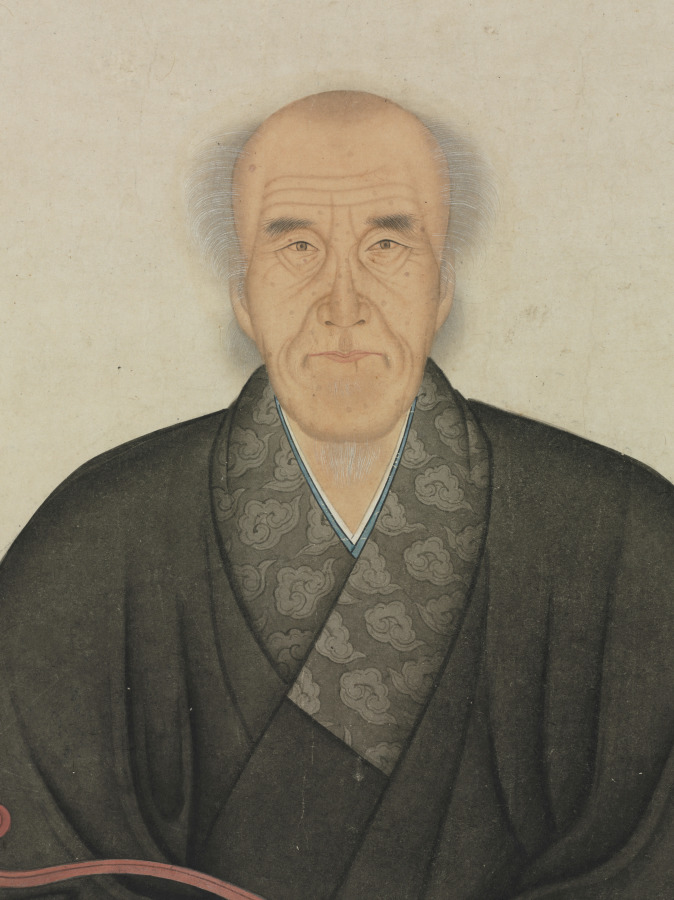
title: Portrait of Duli Xingyi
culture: Japan, Edo period (1615–1868)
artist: Kita Genki (Japanese, active c. 1664–98)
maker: Duli Xingyi (Chinese, 1596–1672)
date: 1671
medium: hanging scroll; ink and color on paper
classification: Painting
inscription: 1671 inscription at top of scroll by Duli Xingyi with three seals, 東矣䪩 (prefatory), 遺世獨立 (top) , 天外一閒人 (bottom); seal of Genki at lower left of painting 元規 .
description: In this portrait, the Ōbaku school Buddhist monk Duli Xingyi (born Tai Li, 1596–1672), whose name is pronounced Dokuryū Shōeki in Japanese, sits upon a woven mat holding a ceremonial scepter known as a ruyi, or nyoi in Japanese. Above his head is an insciption he added to the painting in 1671, the year before his death. It may be translated to read: Contemplative emptiness: the moon suspended over the village at midnight. Suddenly my soul is startled by the howl of an ape. Who could know that it would arouse me beyond my senses, and bring me an inner vision from Mt. Sumeru. (translated by Stephen Addiss and Kwan S. Wong) Originally from what is now the city of Hangzhou in China, Duli emigrated to Japan in 1653, where he took monastic vows. His skills in calligraphy and seal carving were formidable. Painter Kita Genki combined Chinese brush styles he learned in Nagasaki with Western painting techniques to capture Duli's likeness.